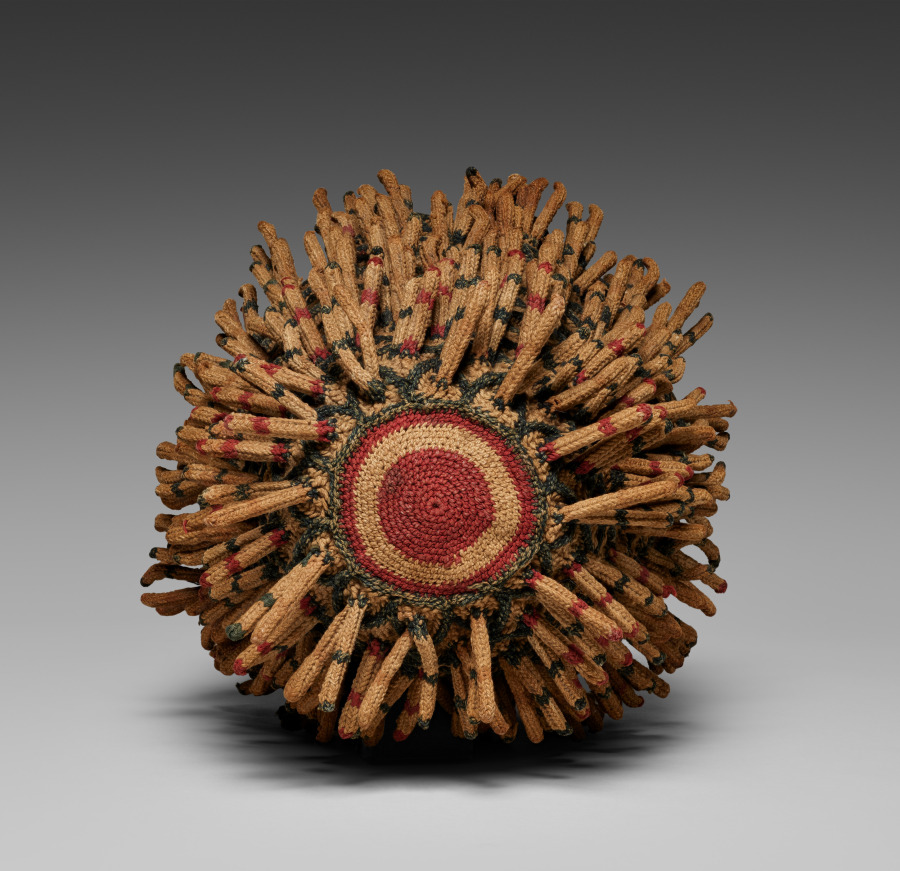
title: Prestige Headdress (Ashetu or shüötu)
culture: Bamum style, unknown maker, Grassfields region, Cameroon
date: 1900–1950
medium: cotton, dye (including indigo)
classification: Textile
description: The bristle-like surface of this man’s prestige headdress is dyed with indigo or a red pigment. Below, a diamond pattern evokes another royal symbol, the leopard. The projections are reinforced with small pieces of wood. Such extensions are seen on prestige headgear represented in wood in sculptures and in colored pencil on drawings in the collection.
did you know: Titled men still wear such prestigious adornment today.